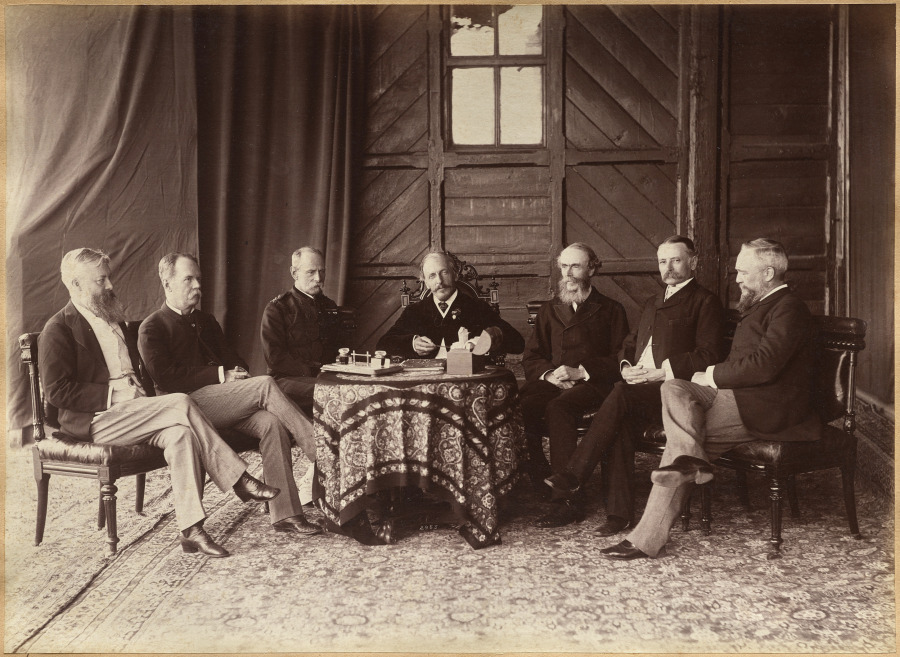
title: The Viceregal Council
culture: India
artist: Raja Deen Dayal (Indian, 1844–1905)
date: c. 1882–87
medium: albumen print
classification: Photograph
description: These photographs are part of an album, now disassembled, of around 105 photographs taken in India between 1885 and summer 1887 that provide glimpses into the lives of the British colonial elite and royal and upper-class Indians. The museum holds another group of 37 pictures from this album (2016.266), which was probably commissioned by a British civil servant visiting or working in India around 1888 as a personal souvenir of his experiences there.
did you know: Raja Deen Dayal is regarded now, and was considered during his lifetime, to be India’s most important 19th-century photographer.